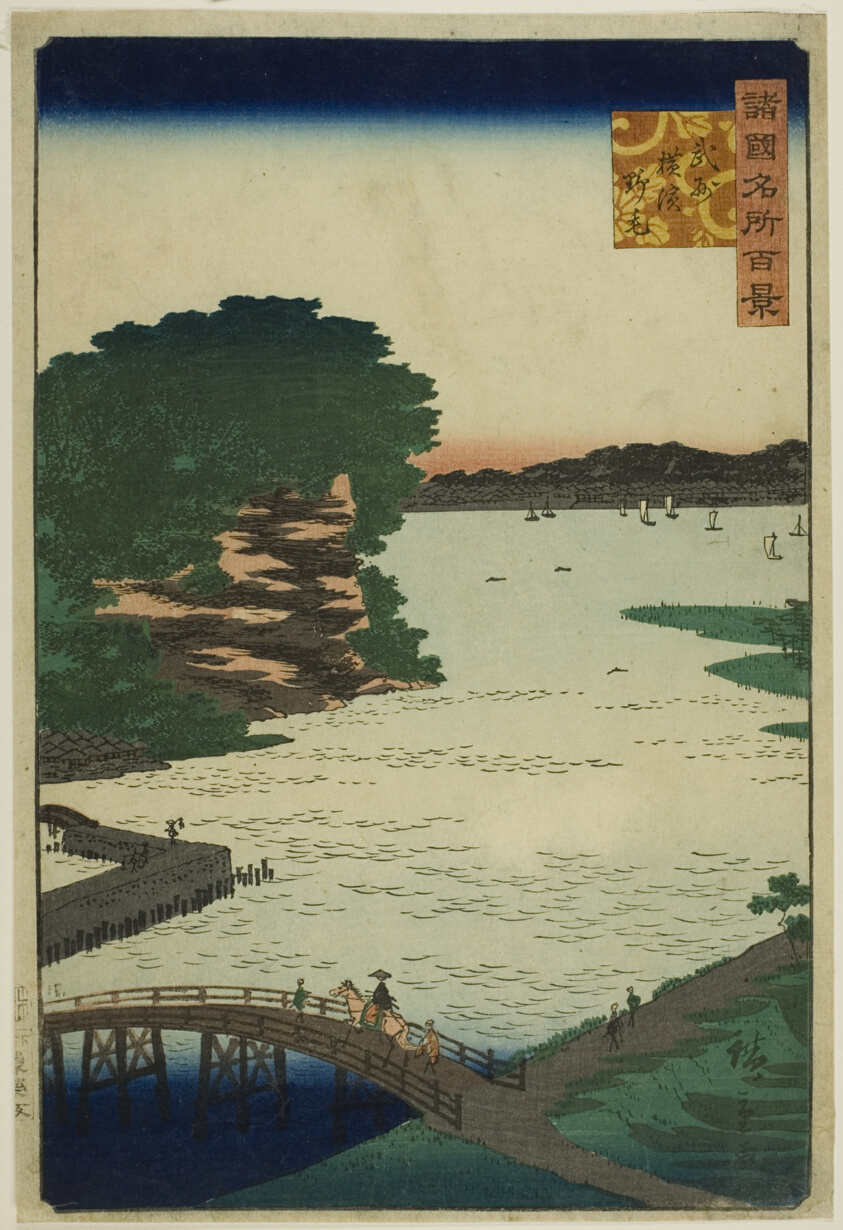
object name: Print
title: Noge in Yokohama, Bushu Province (Bushu Yokohama Noge) from the series “One Hundred Famous Views in the Various Provinces (Shokoku meisho hyakkei)”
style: Japanese (culture or style)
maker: Utagawa Hiroshige II (Shigenobu) (Japanese, 1826–1869)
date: 1859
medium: Color woodblock print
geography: Japan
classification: woodblock print; print